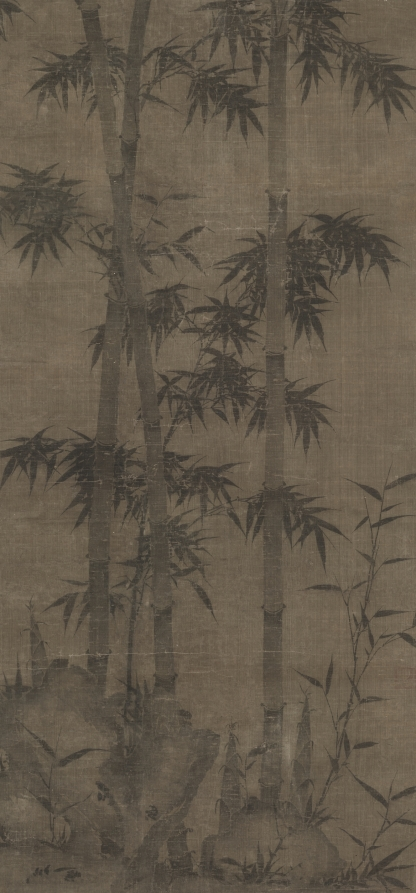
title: Bamboo in Four Seasons: Autumn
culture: China, Yuan dynasty (1271-1368)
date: 1279–1368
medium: hanging scroll, ink on silk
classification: Painting